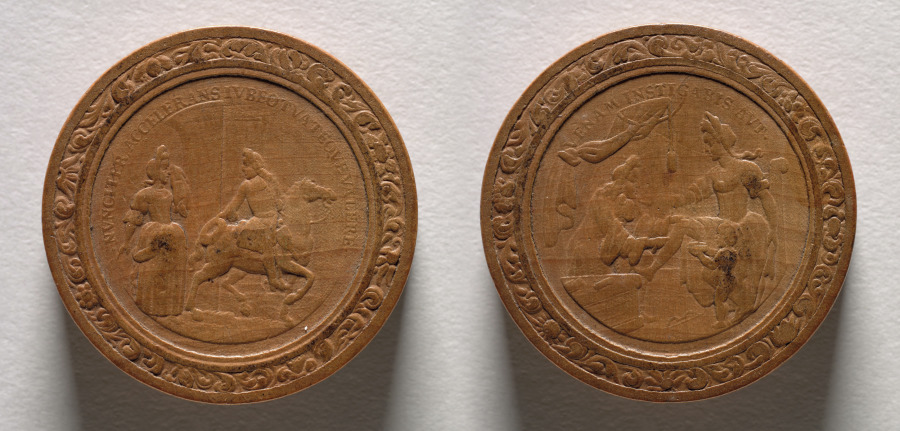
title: Gaming Piece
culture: Germany, late 17th-early 18th Century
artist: Martin Brunner (German, 1659–1725)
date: c.1700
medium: wood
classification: Furniture and woodwork